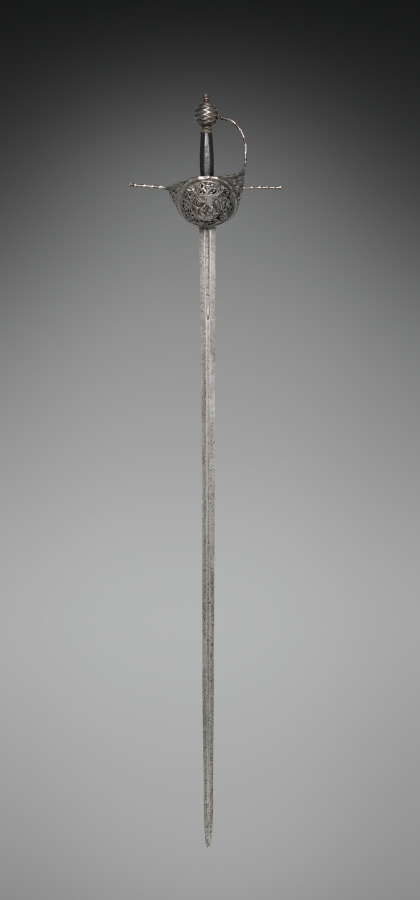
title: Cup-Hilted Rapier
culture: Italy, Milan?, 17th century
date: c.1610–30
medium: steel, pierced, chased and chiseled; wire ferrules on leather-covered wood grip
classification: Arms and Armor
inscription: inscribed on blade: FPNDRITH (on one face) RDFTPHNI (on the other)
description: The rapier was a sword worn with civilian dress and used in duels. The term rapier derives from a 16th-century French word rapière, which in turn derived from the Spanish espada ropera, or “dress sword.” The rapier was a light weapon with a straight double-edged and pointed blade that, with the development of the art of fencing in the 1500s and 1600s, gradually became narrower and lighter, and thus suitable for thrusts only. With the new technique of swordplay emphasizing the point of the blade, sword guards became more complex to protect the duelist’s unarmored hand. These elaborate guards were frequently decorated by various techniques—chiseling, bluing, russeting, and damascening.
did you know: Over time the blade of a rapier became longer, based on a belief that a longer blade made it easier to hit one's adversary and, at the same time stay beyond the reach of his weapon.